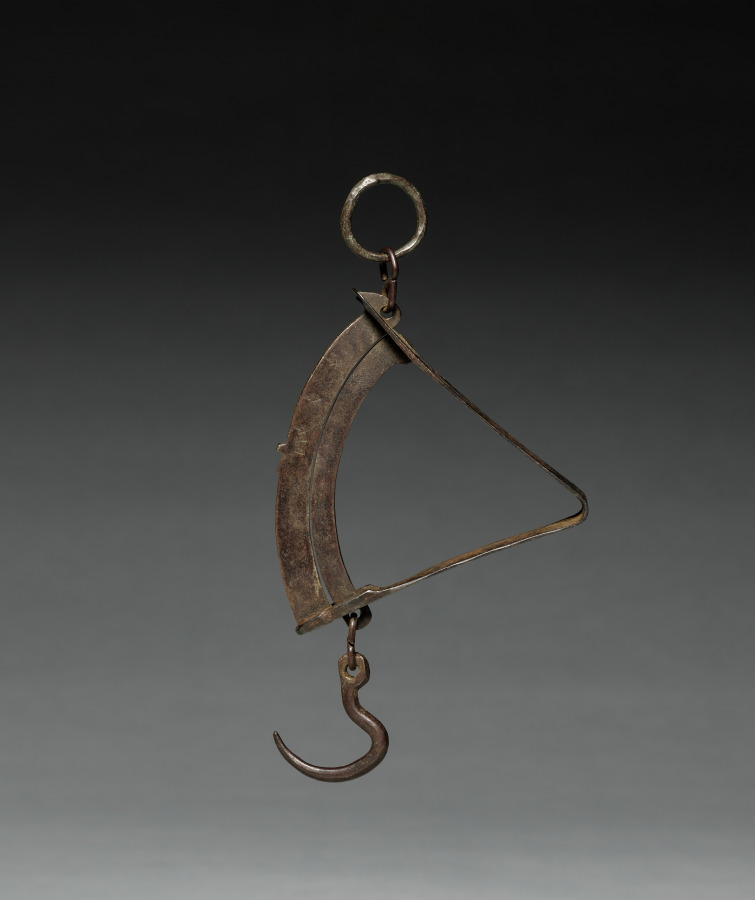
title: Hand Scale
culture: Europe, 18th century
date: 1700s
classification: Tool